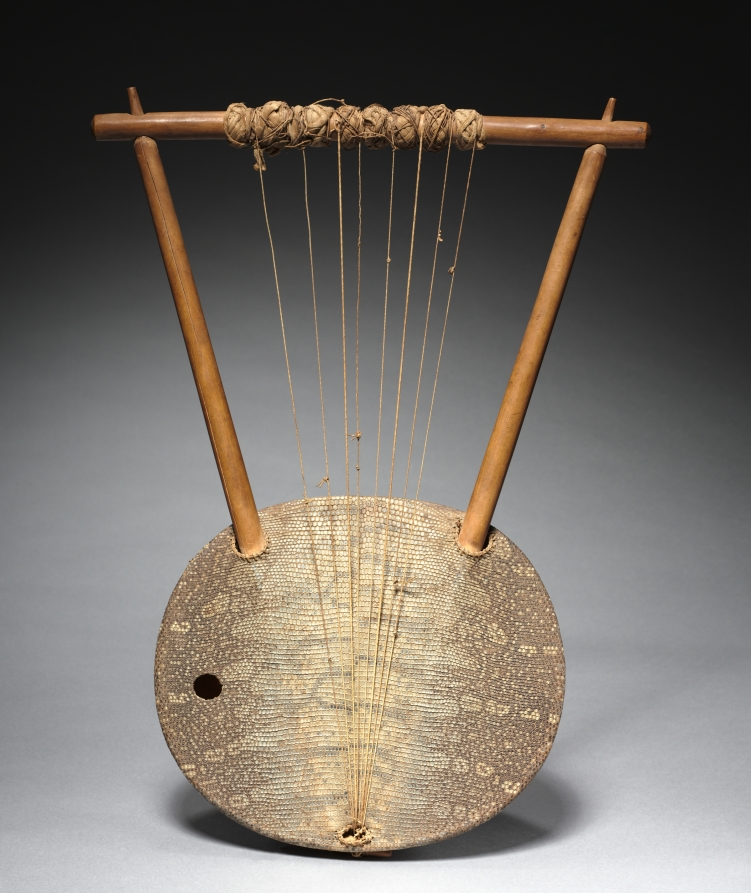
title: Lyre (ndongo, endongo, entongoli, or kissar)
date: by 1928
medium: Wood, reptile skin, pelt, cloth, and natural fiber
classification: Musical Instrument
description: Lyres are common instruments across eastern Africa. The many names––endongo, ndongo, kissar, or entongoli—reflect how many different groups use this Ugandan type. This example is made from a wooden bowl-shaped sound box covered in the skin of a reptile, possibly a monitor lizard. The strings lead up to a crossbar once decorated with goat hair tassels at each end and sometimes cowrie shells.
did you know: Imagine the buzzing, resonant sound that this string instrument would make.